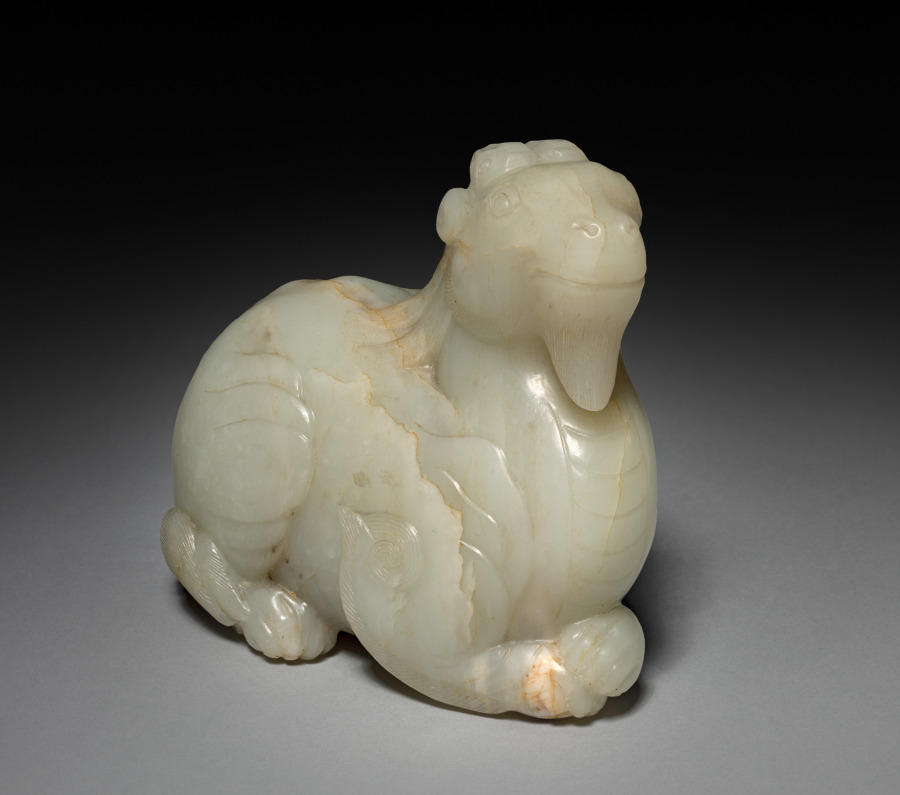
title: Fantastic Animal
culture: China, Qing dynasty (1644-1911)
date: 1700s–1800s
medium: jade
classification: Jade